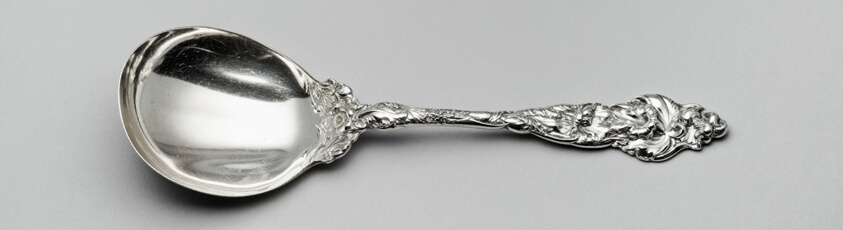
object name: Metalwork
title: Serving Spoon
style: 20th Century, Arts and Crafts Movement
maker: Reed and Barton (American, founded 1824); Taunton, Massachusetts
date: 1903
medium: Silver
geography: Taunton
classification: utensil for serving food; silver; utensil; spoon; american decorative arts; american arts; decorative arts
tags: spoon, flowers, eating